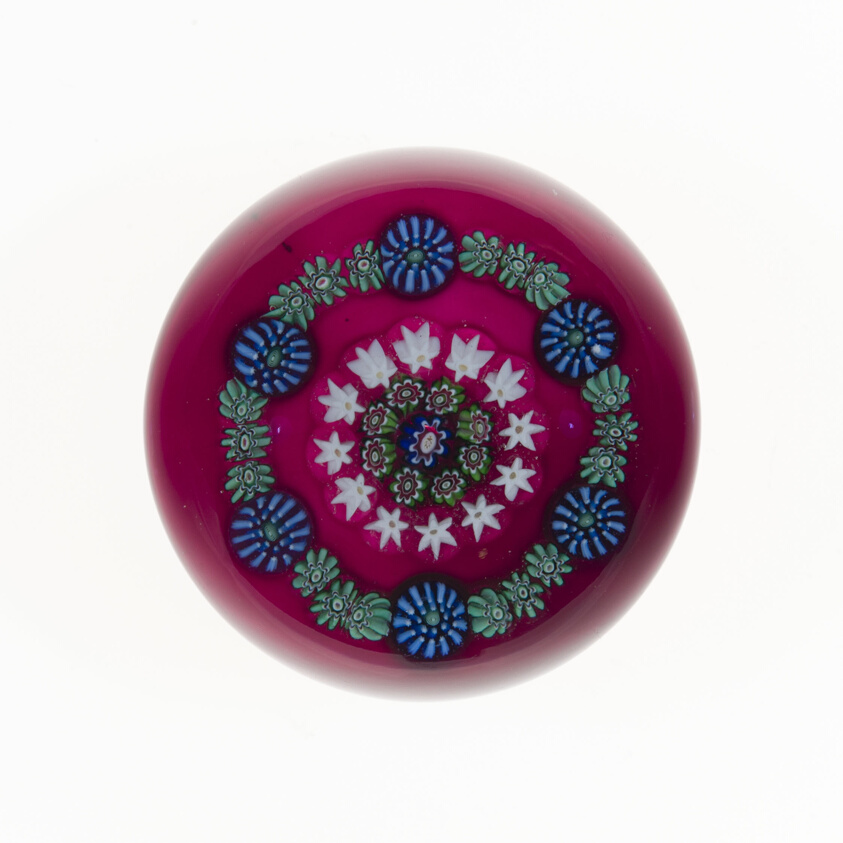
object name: Glass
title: Paperweight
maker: Clichy Glassworks (Cristalleries de Clichy); Clichy, France, 1837-1885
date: 19th century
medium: Glass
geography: Clichy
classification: paperweight; millefiori; european decorative arts; glass